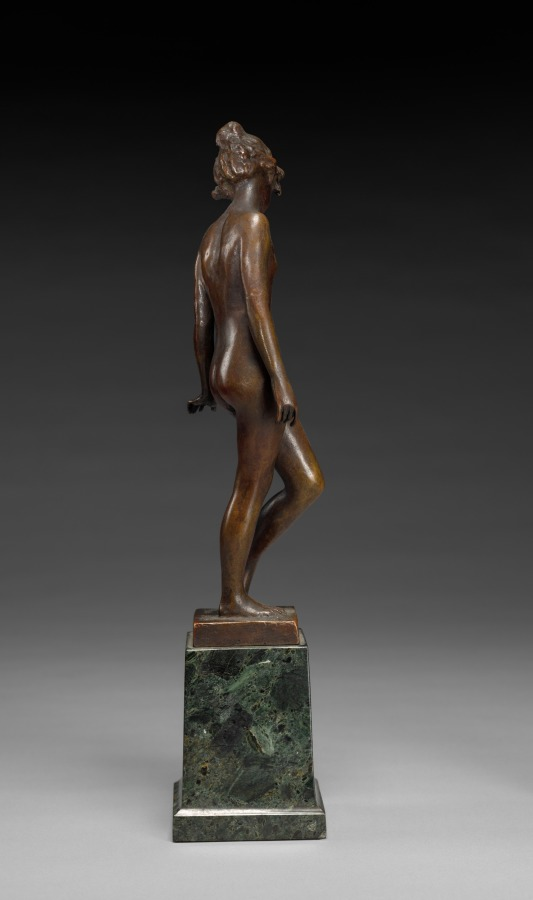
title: Butterfly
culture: America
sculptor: Emil Fuchs (American, born Austria, 1866–1929)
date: c. 1919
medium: bronze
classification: Sculpture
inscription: Signed on base: EMIL FUCHS